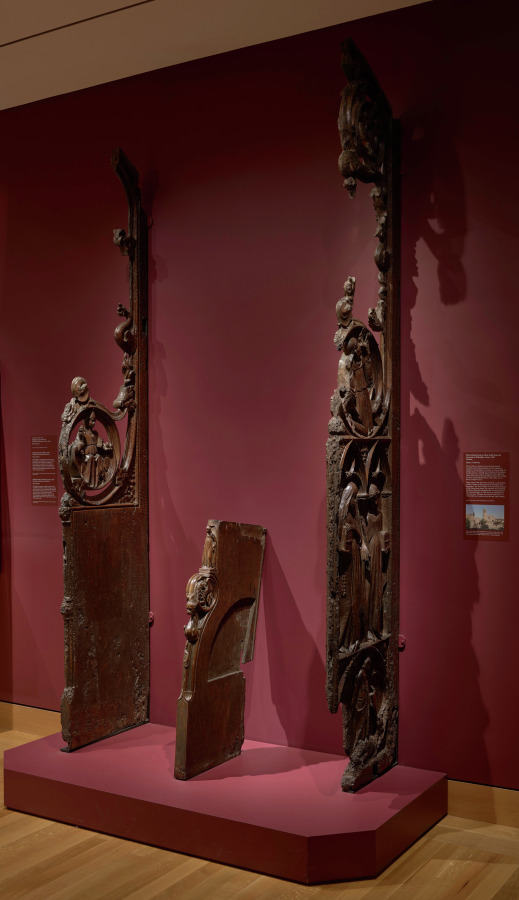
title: Panel from a Choir Stall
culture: Spain, Catalonia, Monastery of Pedralbes, 14th century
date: c. 1330–1340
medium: walnut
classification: Furniture and woodwork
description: The smaller panel here originated from an interior portion of a choir stall. The panel depicts a female figure in a long gown standing on a plinth above two of the apocalyptic beasts, the winged lion of Saint Mark and the winged ox of Saint Luke, which are supported by a wyvern (a heraldic winged dragon).